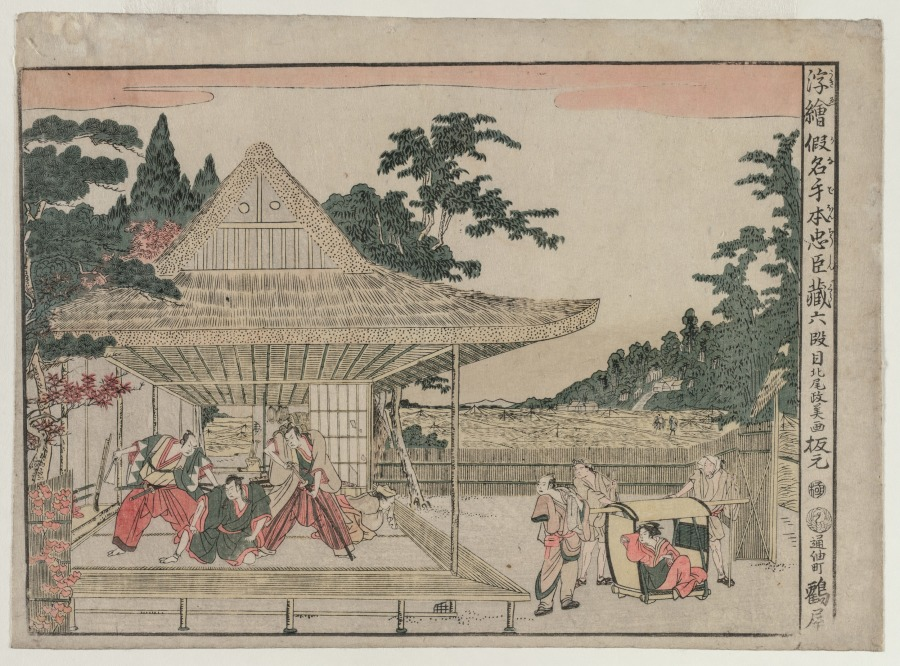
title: Chushingura: Act VI (from the series Perspective Pictures for The Treasure House of Loyalty)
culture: Japan, Edo period (1615–1868)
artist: Kitao Masayoshi (Japanese, 1761–1824)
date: c. 1790s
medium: color woodblock print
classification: Print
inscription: Signature: Kitao Masayoshi ga Publisher: Tsuruya Kiemon (hammoto Toriaburacho Tsuruya, emblem) Censorship Seal: kiwame